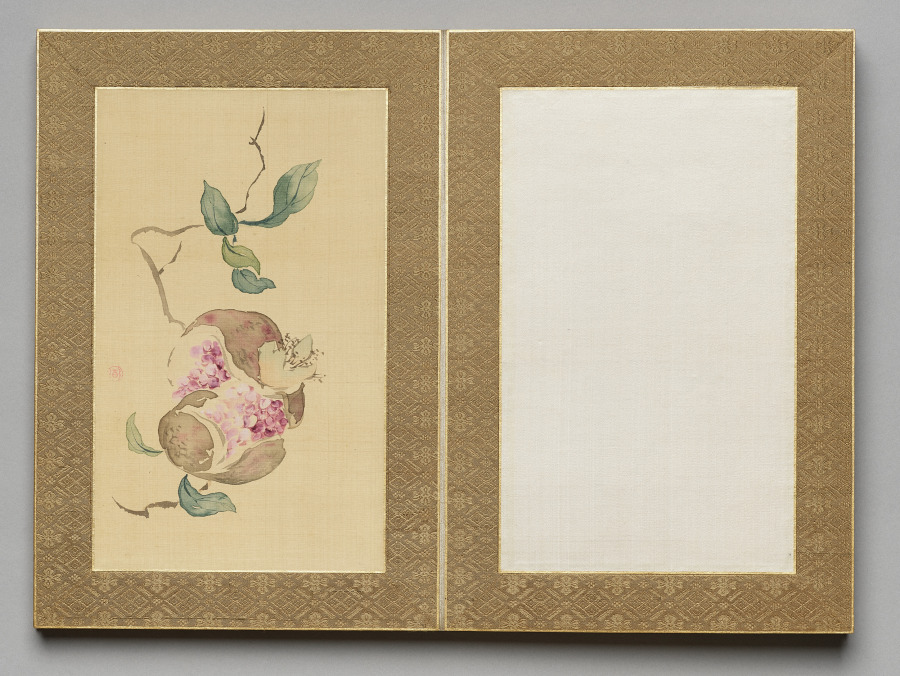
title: Painting from Flowers and Grasses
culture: Japan, Edo period (1615–1868)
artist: Tsubaki Chinzan (Japanese, 1801–1854)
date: 1841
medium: album; ink and color on silk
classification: Painting